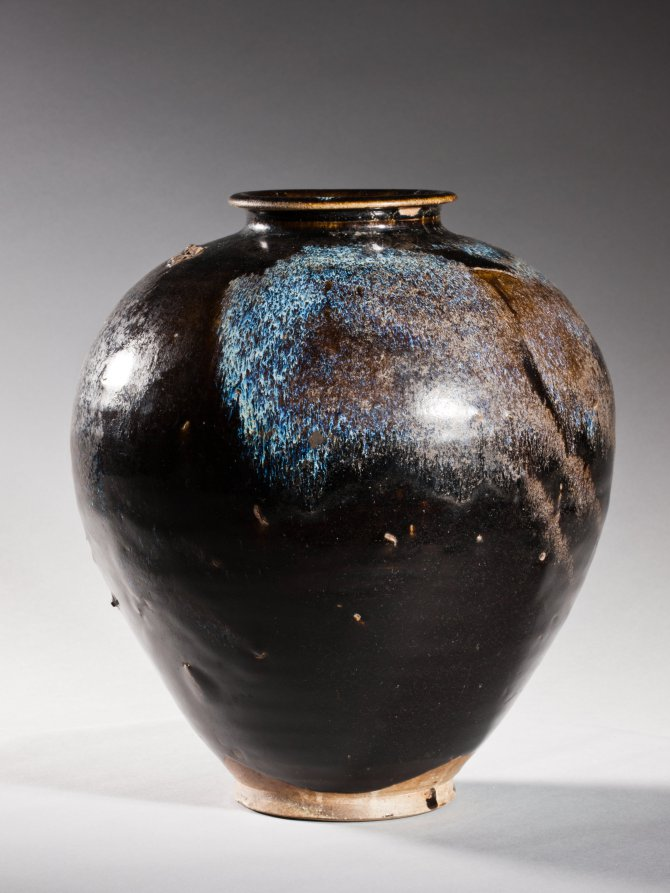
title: Jar: Black Ware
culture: China, Henan province, Huangdao kilns, Tang dynasty (618-907)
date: 700s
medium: glazed stoneware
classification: Ceramic